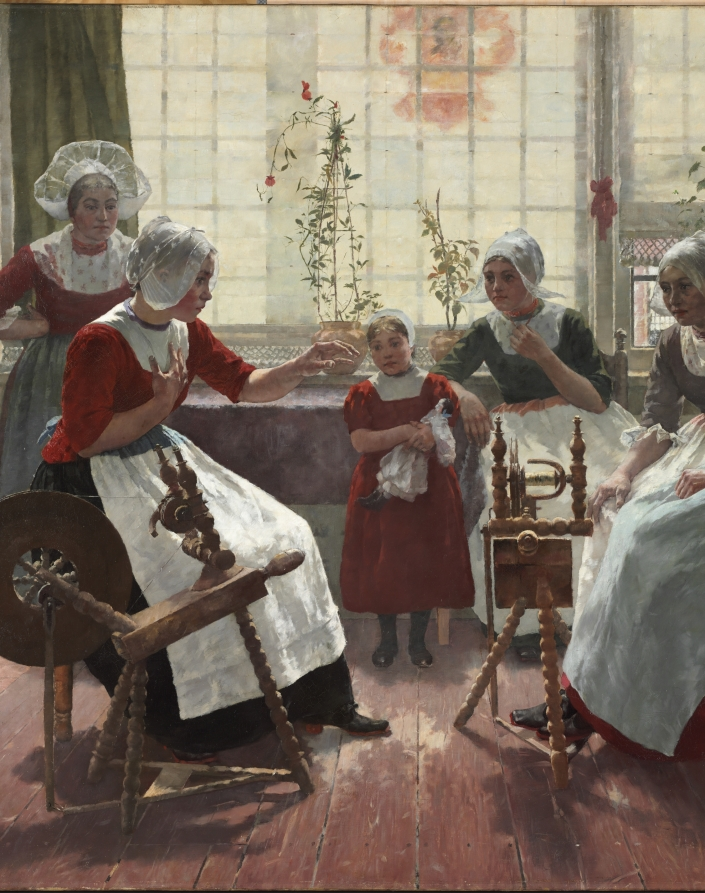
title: The Ghost Story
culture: America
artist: Walter MacEwen (American, 1860–1943)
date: 1887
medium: oil on canvas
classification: Painting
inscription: signed upper left: W. McEWEN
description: During the 1880s, the Netherlands became a magnet for several American artists, among them Walter MacEwen. His most famed painting, The Ghost Story, presents a group of individuals in a Dutch interior listening with rapt attention to spooky narration delivered by a woman at a spinning wheel. A young girl clutches her doll in fascination.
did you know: The women in this painting wear the traditional clothing of Volendam, a fishing village located in the province of North Holland.